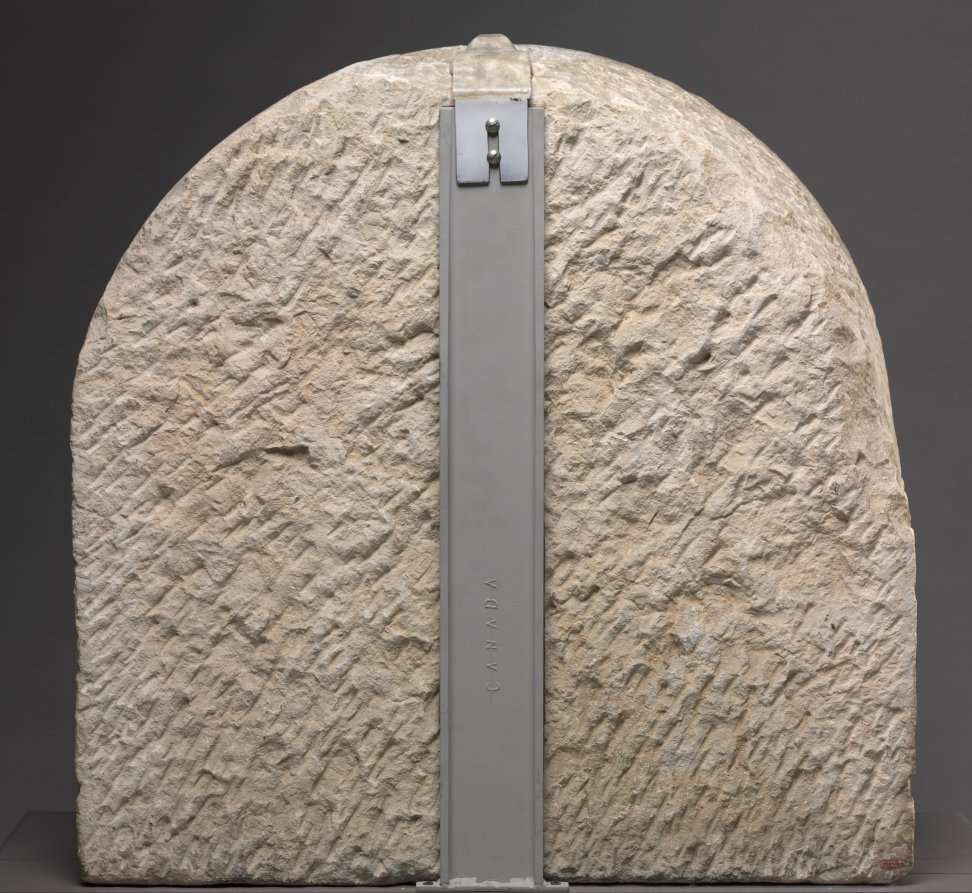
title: Julius Caesar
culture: Italy, Florence, 15th century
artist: Mino da Fiesole (Italian, c. 1430–1484)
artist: garland by Mino da Fiesole and Workshop (Italian, c. 1430–1484)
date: c. 1455–60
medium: marble with traces of bole (red clay) and limestone with traces of paint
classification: Sculpture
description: Renowned Roman general and statesman Julius Caesar (100–44 BCE) appears here as a political rather than military leader, worn by the burdens of office, with carefully described signs of aging. Mino probably used ancient coins from the collection of the Medici, Florence's ruling family, as his starting point for this sculpture. However, the complex carving, the clinging drapery, and the psychological intensity all characterize the inventiveness Renaissance artists brought to classical subject matter. In this case, Caesar offered an important model for leadership, masculinity, and composure. The garland is clearly by a different hand, but passages, such as the ribbons and flowers in low relief, correspond to details found in other decorative carvings from Mino's workshop. Initially, the limestone setting was probably put into a wall, perhaps in a lunette over the door, from which it was later removed. However, the relationship between the garland and the relief has not yet been clarified and is the subject of ongoing research.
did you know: Traces of paint on this white marble relief indicated that it was once brightly painted.